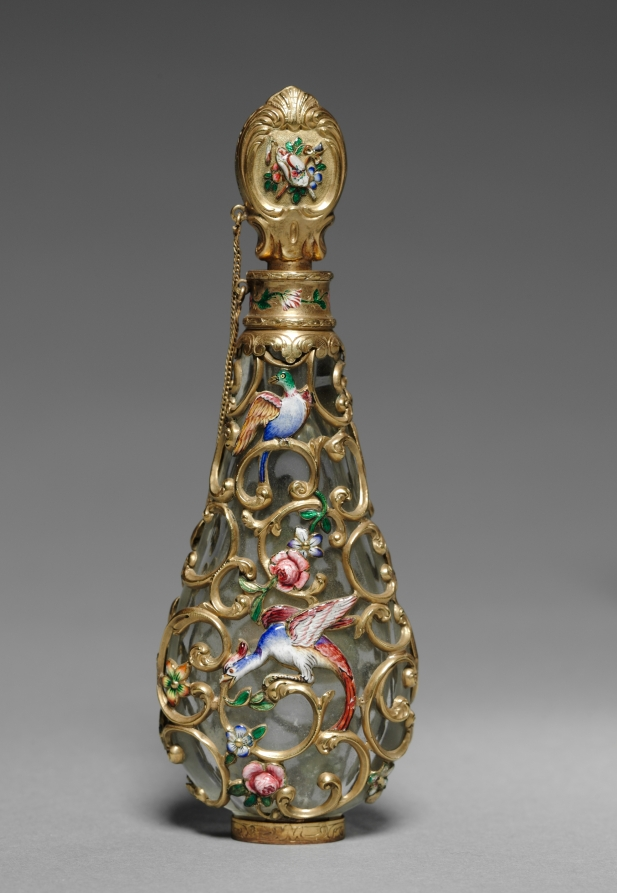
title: Scent Bottle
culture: France, mid-19th century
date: mid-1800s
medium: glass with gold and enamel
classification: Miscellaneous